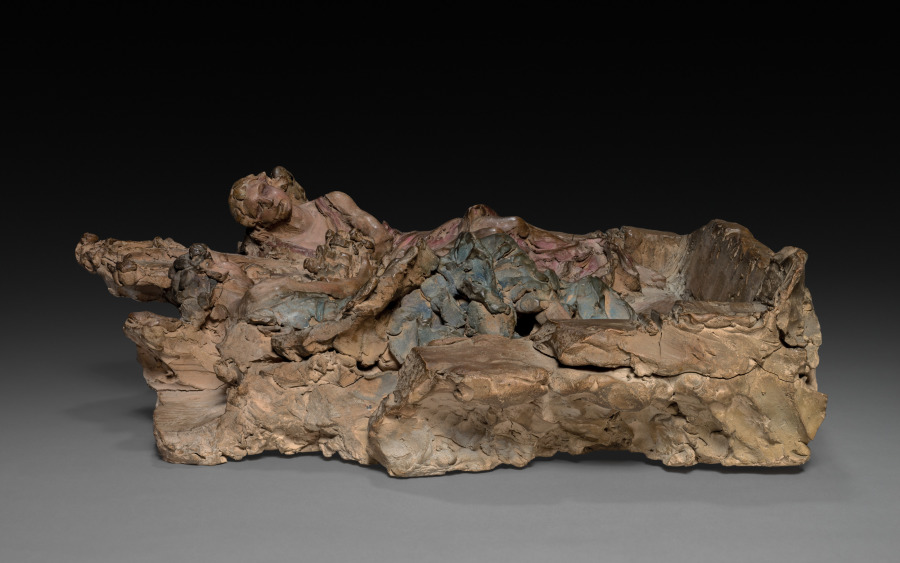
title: Two Angels and Cherubs Bearing an Icon of Christ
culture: Italy, Rome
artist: probably by Paolo Naldini (Italian, 1616–1691)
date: c. 1670–80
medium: terracotta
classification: Sculpture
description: This work is probably a study for a large altarpiece that would have combined several materials, including marble, stucco, and paint. The artist modeled his design in soft clay, which was then hardened by firing; subtle tints suggest the richness of the finished work. The idea of using sculptural figures to support a painted image within an altarpiece was influenced by the work of the Roman sculptor Gian Lorenzo Bernini (1598–1680), with whom Naldini is known to have worked.